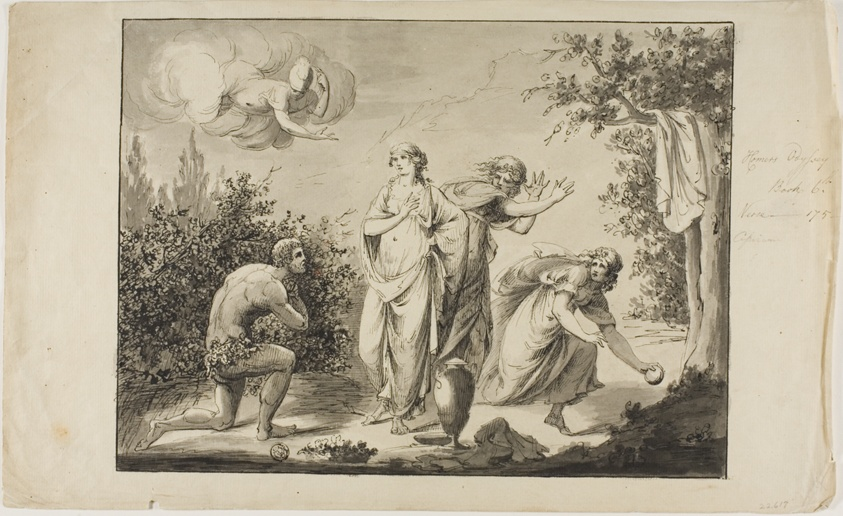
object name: Drawing and Watercolor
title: Ulysses and Nausicaa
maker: Giovanni Battista Cipriani (Italian, 1727-1785)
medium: Pen and black ink with brush and gray wash, on cream laid paper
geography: Italy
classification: pen and ink drawings; drawings (visual works); prints and drawing